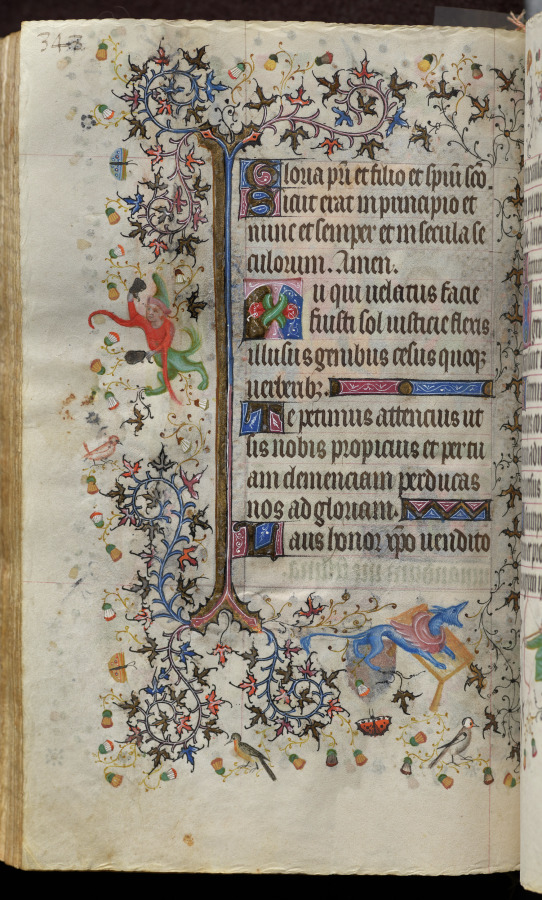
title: Hours of Charles the Noble, King of Navarre (1361-1425): fol. 169v, Text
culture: France, Paris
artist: Master of the Brussels Initials and Associates (French)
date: c. 1405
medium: ink, tempera, and gold on vellum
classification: Bound Volume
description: This precious volume was obviously highly prized by its owner, the French-born King of Navarre, who had his coat of arms painted on no less than twenty folios. Rather than directly commissioning this manuscript from a specific workshop, it seems that Charles the Noble acquired his book of hours -- perhaps ready-made for the luxury market -- while on a trip to Paris in 1404-05. A collaborative effort, six painting styles are evidenced within the pages of this codex, those of two Italians, two Frenchmen, and two Netherlanders. The painter who was responsible for the planning and decoration of the book, and who produced seventeen of the large miniatures, was a Bolognese artist known as the Master of the Brussels Initials. His principal assistant, responsible for most of the borders, was a Florentine who signed his name "Zecho" da Firenze on folio 208 verso.